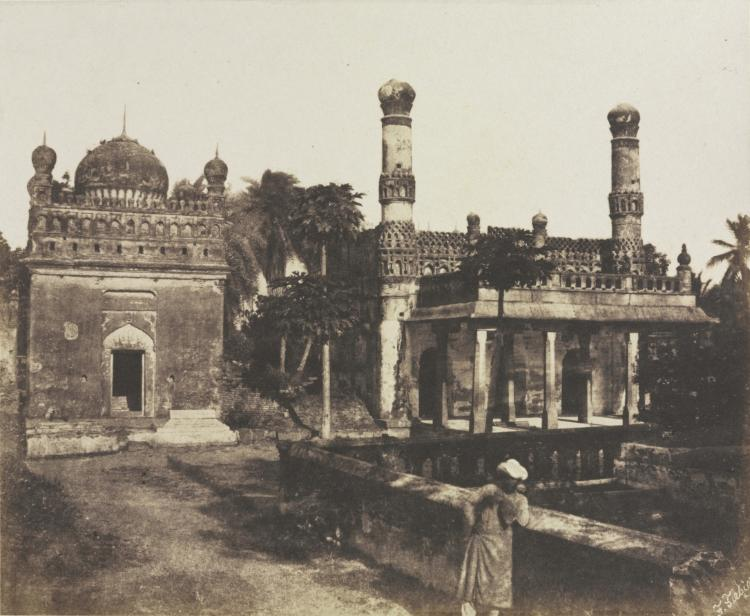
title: Mosque, Madras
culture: Germany, 19th century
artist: Frederick Fiebig (German)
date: 1851–1852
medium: salted paper print from wet collodion negative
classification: Photograph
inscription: printed in image in lower right corner: "F. Fiebig" written in black on label on mount: "56.Mosque-Madras" written in pencil on verso: "22898/14" "56"